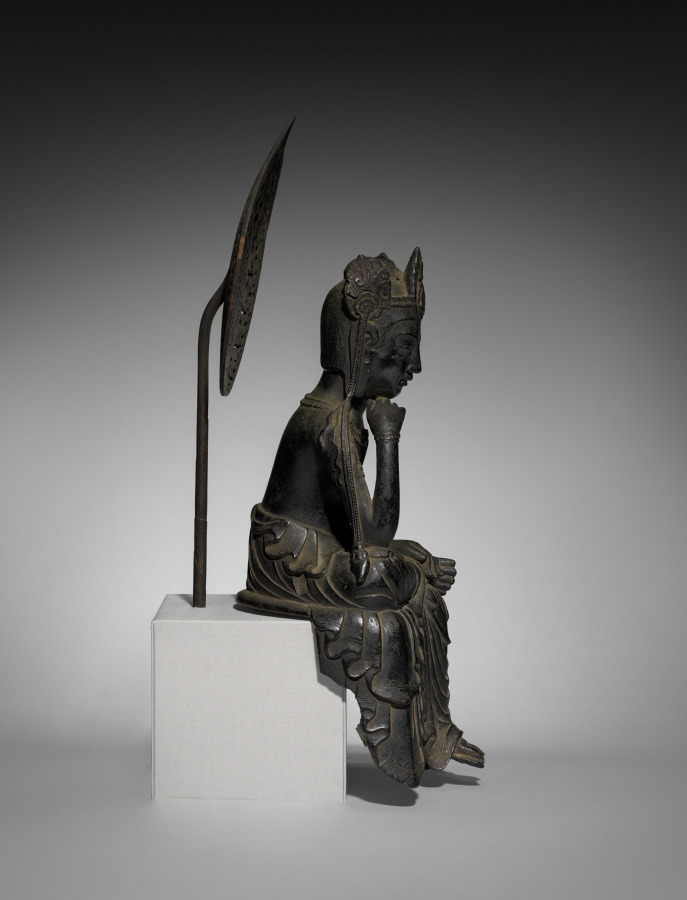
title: Buddha of the Future (Miroku Bosatsu)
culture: Japan, Asuka period (538–710)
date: late 600s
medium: cast bronze, incised, with traces of gilding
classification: Sculpture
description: Buddhism was introduced to Japan in the sixth century. For early Japanese devotees, Buddhism offered the promise of salvation through faith in the Buddha of the Future, who would appear at the end of the world. The concept of eternal salvation held particular resonance with the Japanese aristocracy, who became the staunchest supporters of this new faith. Small sculptures like this one, with its gentle grace and powerful presence, were popular devotional objects.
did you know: The Sanskrit name of this being, Maitreya, derives from the Sanskrit word for friend, mita.